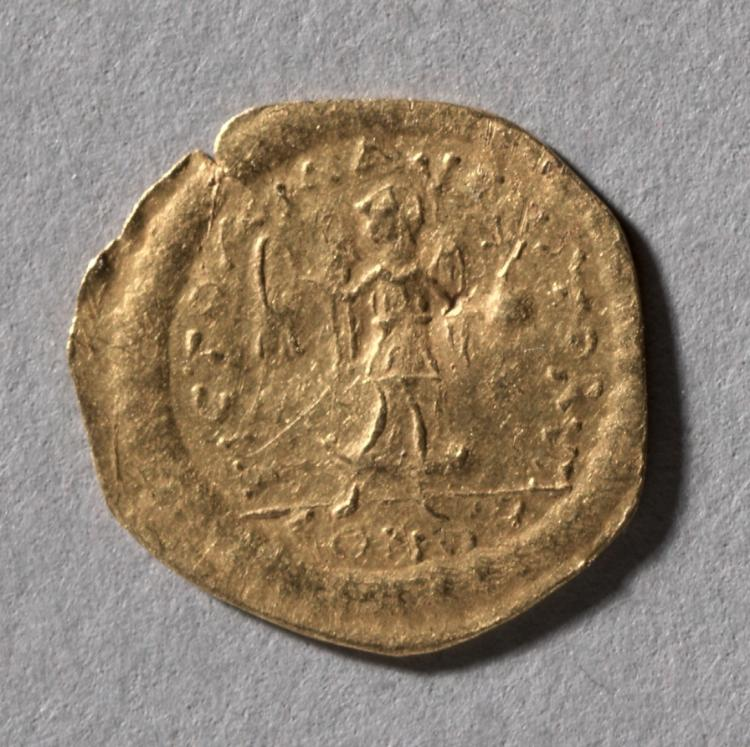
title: Half Tremissis of Justinian I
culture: Byzantium, Constantinople, Byzantine period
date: 527–565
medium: gold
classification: Coins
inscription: (Avers): DNIVSTINI ANVSPPA[VC] (Revers): VICTORIAAVC[VS]TORVM and CONO[B]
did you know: Tremissis means "a third of a unit," referring to this coin's value in ancient Greece.